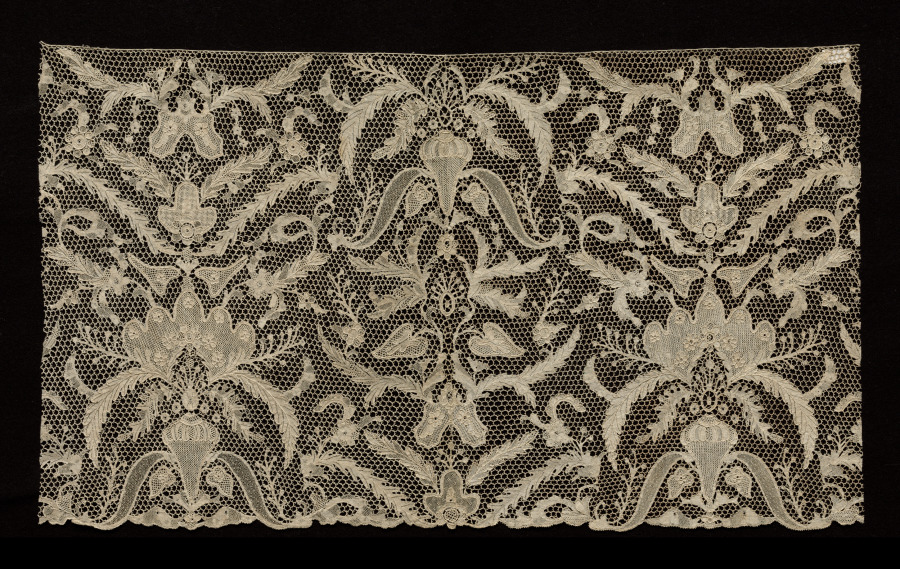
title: Lace Edging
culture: France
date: 1900–1935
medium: Linen: needle lace (Point de France)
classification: Lace